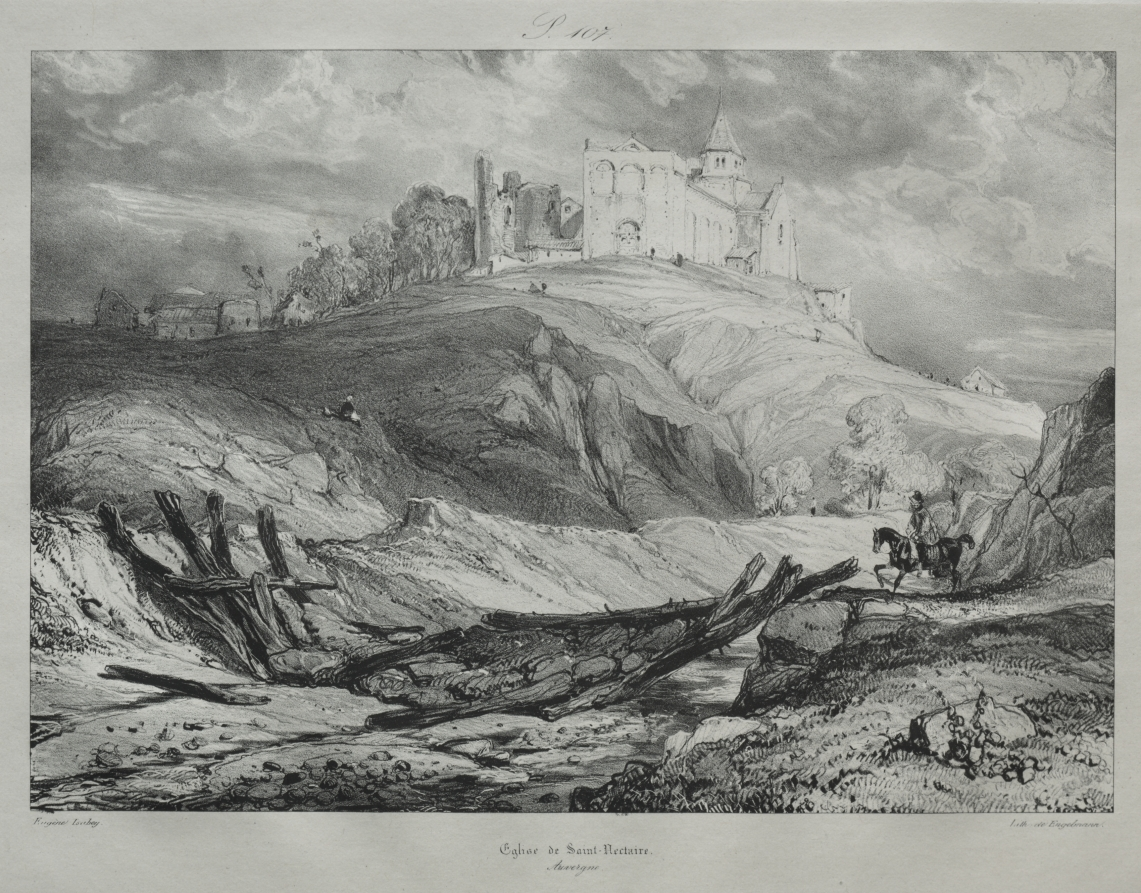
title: Église de St. Nectaire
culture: France, 19th century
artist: Eugène Isabey (French, 1803–1886)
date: c. 1830–32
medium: lithograph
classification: Print